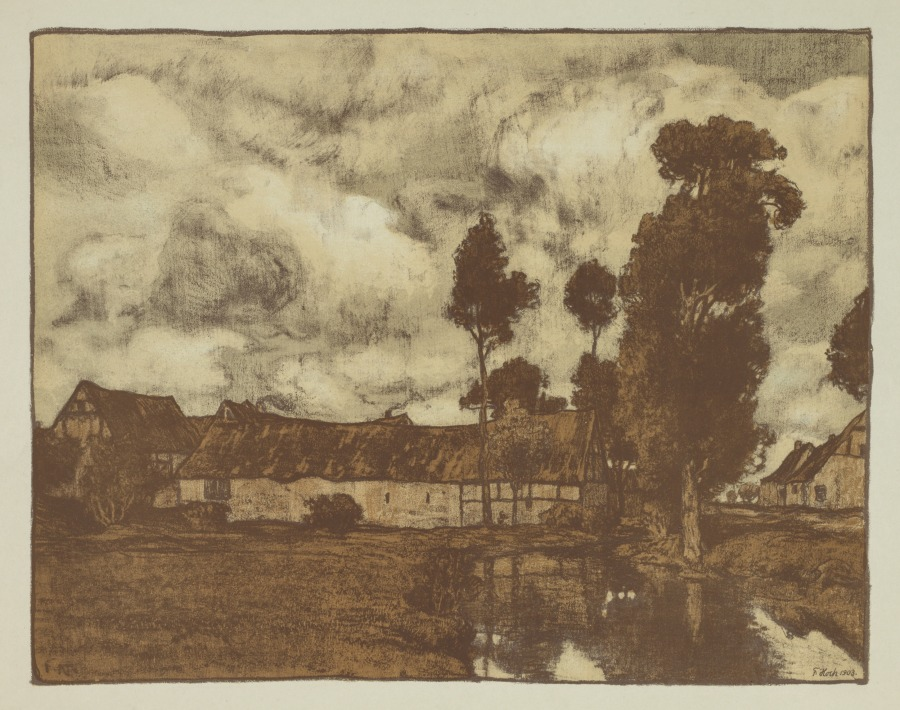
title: Eifeldorf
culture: Germany, early 20th Century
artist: Franz Xaver Hoch (German, 1869–1916)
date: 1903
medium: color lithograph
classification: Print